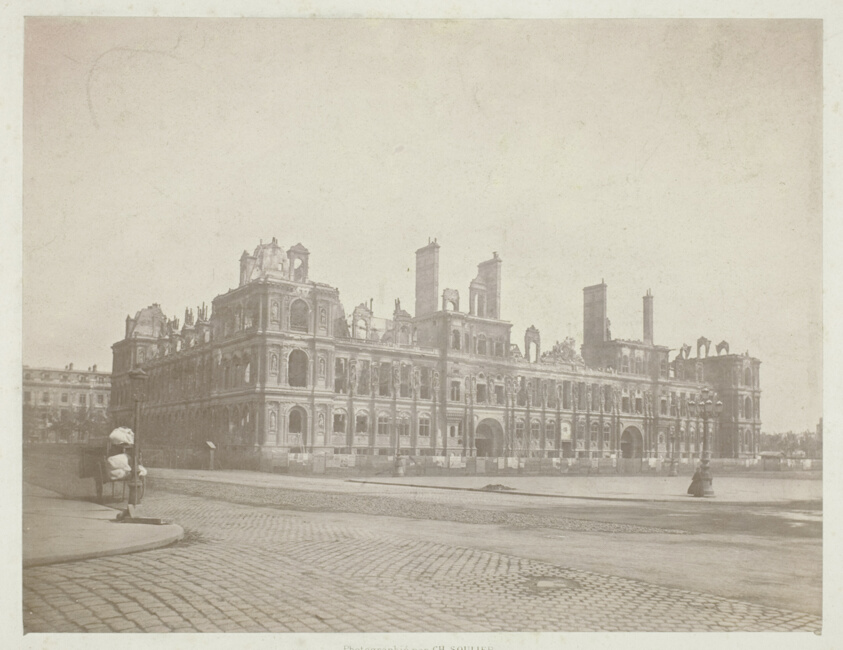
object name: Photograph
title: Paris Fire (The Facade of City Hall), from the series "Paris Incendié"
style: 19th century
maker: Charles Soulier (French, 1840–1875)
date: May 1871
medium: Albumen print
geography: France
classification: albumen silver print; photographic process; photography; photograph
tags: Collected by Hugh Edwards, Paris